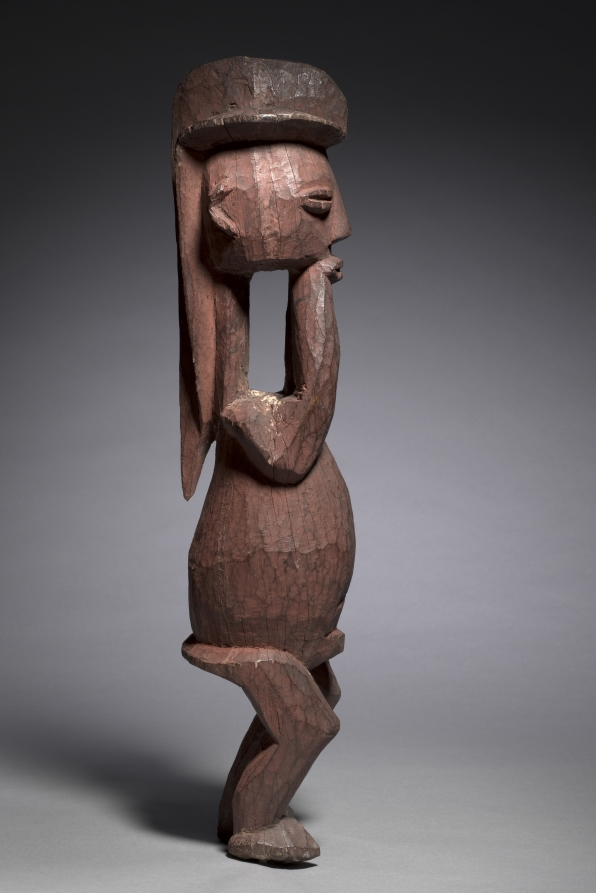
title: Male Figure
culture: Africa, Central Africa, Democratic Republic of Congo, Hungaan-style maker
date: mid- to late 1800s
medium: Wood and colorant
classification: Sculpture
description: Hungaan figures of this size served as guardians of ritual shrines and functioned in rituals to promote fertility, guarantee well-being, and ensure longevity. The striking crested hairstyle imitates a real coiffure or a wig, indicative of status and prestige. The hands supporting the chin identify the figure as a chief who is immersed in thought and contemplation, pondering over his responsibilities.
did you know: The red powdery surface of this figure mimics a red body adornment that mixed ground camwood with palm oil.